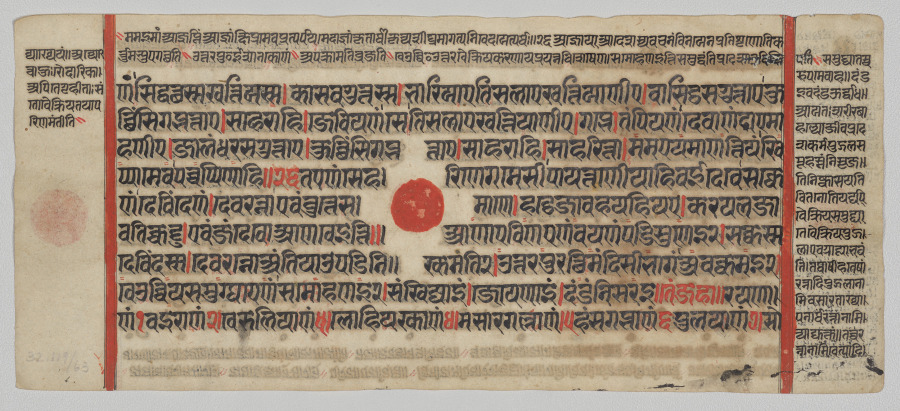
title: Text, folio 11 (recto), from a Kalpa-sutra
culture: Western India, Gujarat, last quarter of the 15th century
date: c. 1475–1500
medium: Gum tempera, ink, and gold on paper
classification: Painting